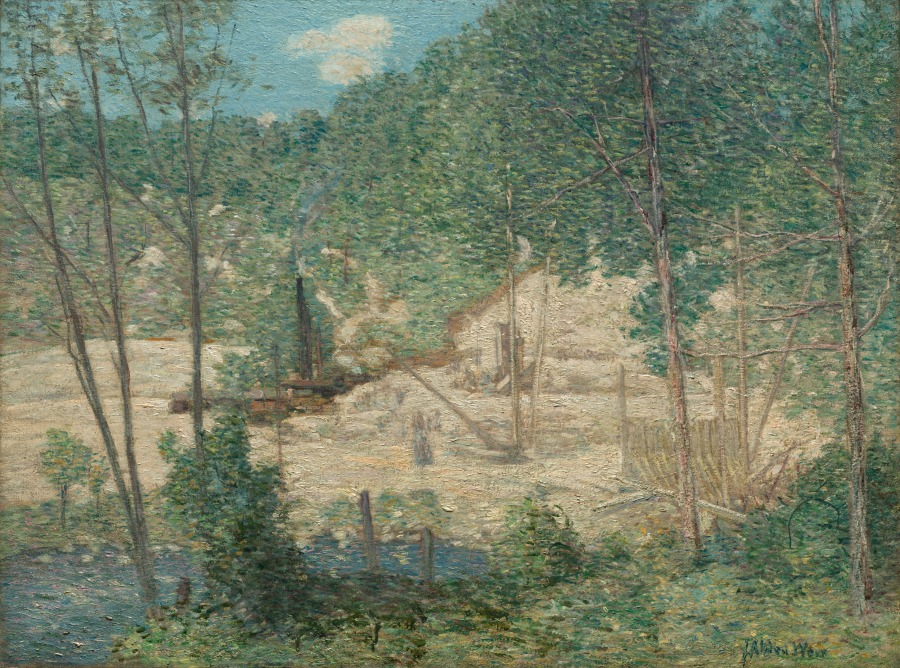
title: The Building of the Dam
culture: America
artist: Julian Alden Weir (American, 1852–1919)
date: 1908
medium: oil on canvas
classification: Painting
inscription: Signed lower right: "J. Alden Weir"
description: Julian Alden Weir's painting shows the construction of the Scotland Dam, built between 1907 and 1909 on the Shetucket River near his summer home in Windham, Connecticut. The artist had a vested interest in the subject, as the dam ensured an energy supply to the area's inhabitants that included his family.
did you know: The artist was the 14th of 16 children born to his parents.